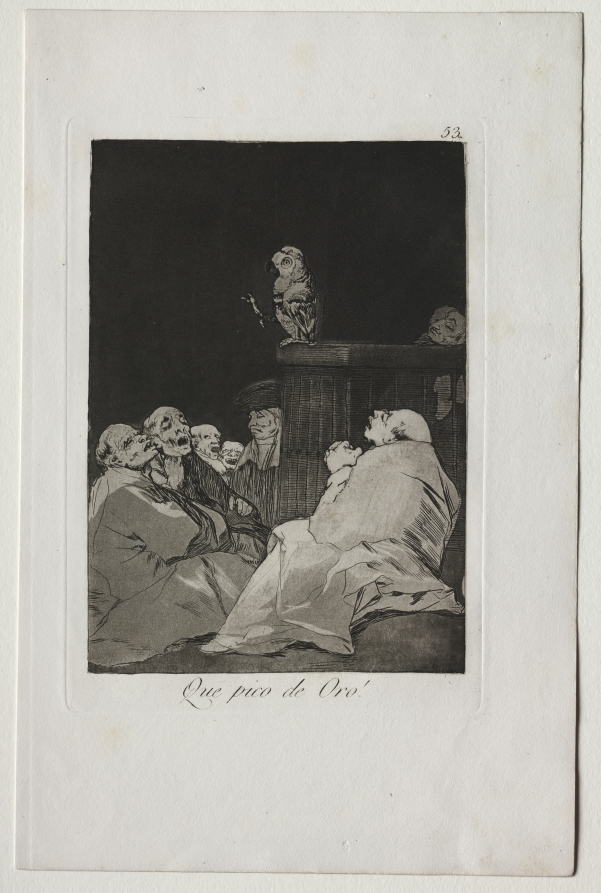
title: What a Golden Beak!, Plate 53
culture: Spain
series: Los Caprichos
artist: Francisco de Goya (Spanish, 1746–1828)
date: 1799 (printed c. 1855)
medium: etching and aquatint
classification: Print